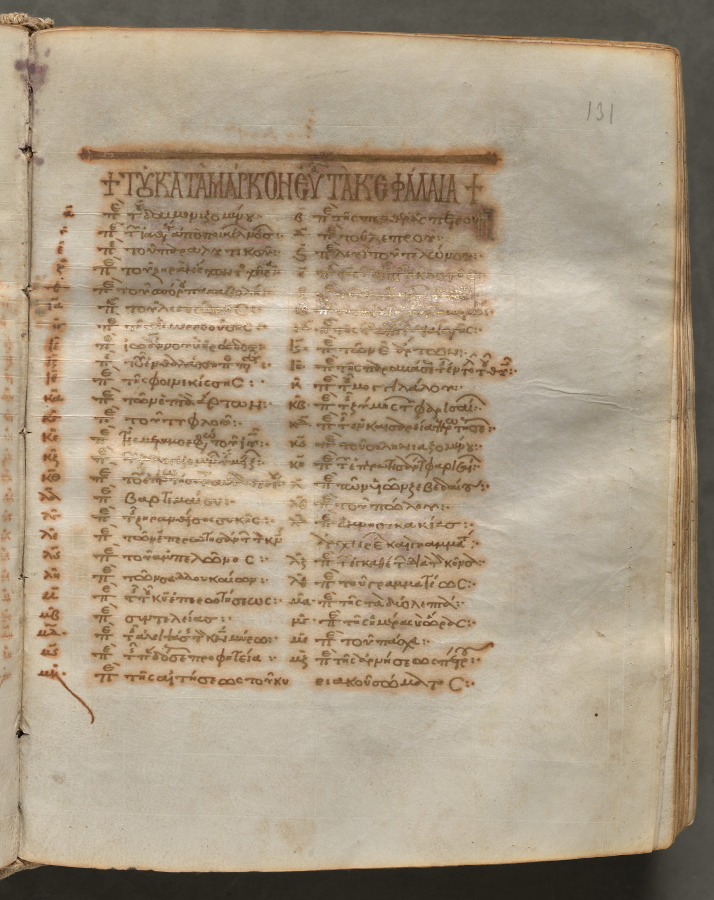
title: Text, folio 131 (recto), from a Gospel Book with Commentaries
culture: Byzantium, Constantinople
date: c. 1000–1100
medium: ink, tempera, and gold on vellum; leather binding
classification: Bound Volume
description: Each of the four gospels in this book opens on a page with brilliantly illuminated borders depicting the author of the text as well as birds-principally peacocks, symbols of the immortality of the soul-and fountains, representing the fountain of life and the salvation of the soul. This volume consists of 428 leaves with texts in Greek. Its level of sophistication suggests that it was probably written and decorated in a monastery in Constantinople.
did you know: Gospel Books were carried in procession through Byzantine churches.